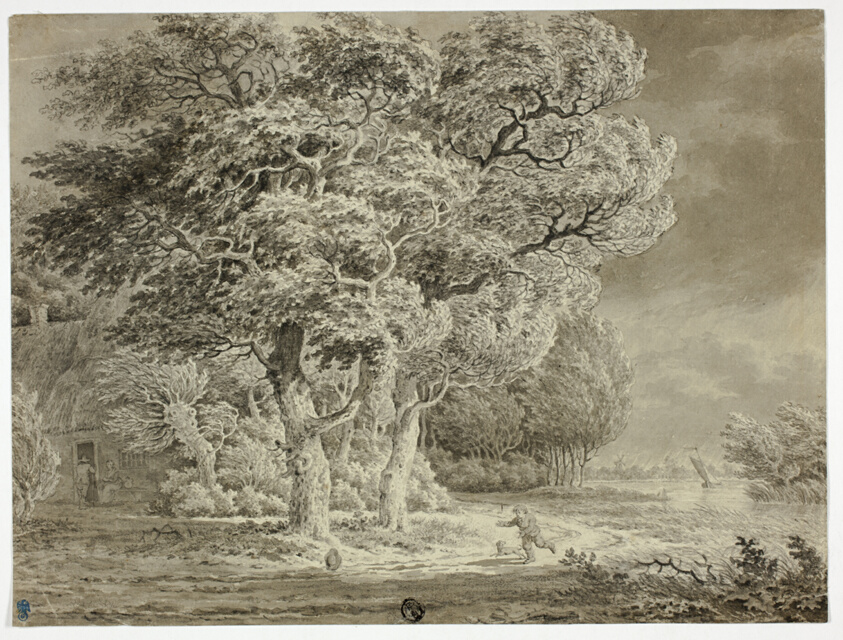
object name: Drawing and Watercolor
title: Approaching Storm; Wind Blown Trees; Boy and Dog Running Home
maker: Circle of Egbert van Drielst (Dutch, 1746-1818)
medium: Brush with black and gray wash, over black chalk, on ivory laid paper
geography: Holland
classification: ink or chalk wash; drawings (visual works); prints and drawing